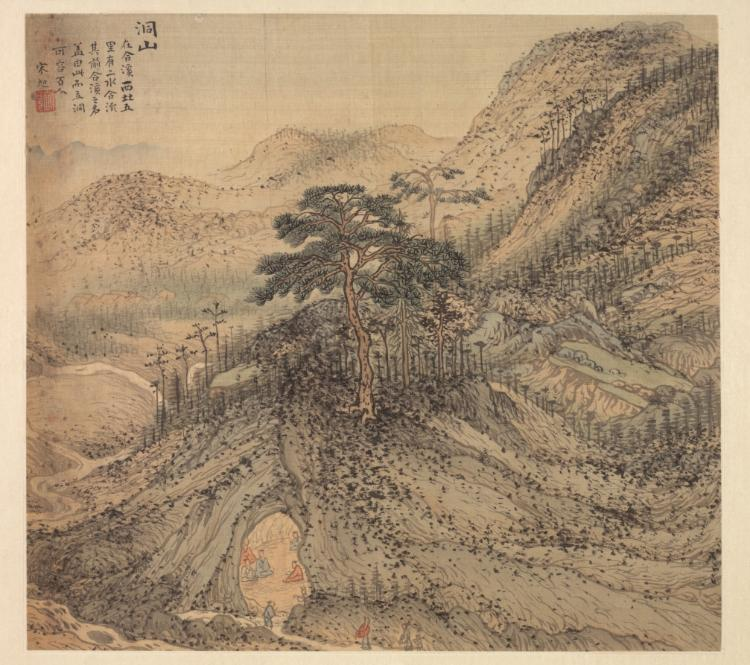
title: Mt. Dong (Grotto Mountain)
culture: China, Jiaxing, Ming dynasty (1368–1644)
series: Eighteen Views of Huzhou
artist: Song Xu (Chinese, 1525-c. 1606)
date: c. 1588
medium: Album leaf; ink and color on silk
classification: Painting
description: This album of landscape paintings depicts the famous scenic areas located in and around the city of Wuxing in southeastern China. These places were all known for their natural beauty, but in addition, a number were distinguished by their links to eminent historical figures and events. The artist, Song Xu, was not a native of Wuxing, but must have visited it when he accepted the commission, for he carefully depicted all eighteen views and wrote comments on each of them. Song's gazetteer-like notation on this leaf reads: Grotto Mountain: Five li northwest of Hexi, there are two streams converging; Hexi (literally converging streams) is derived from this. The cave can hold a hundred people.